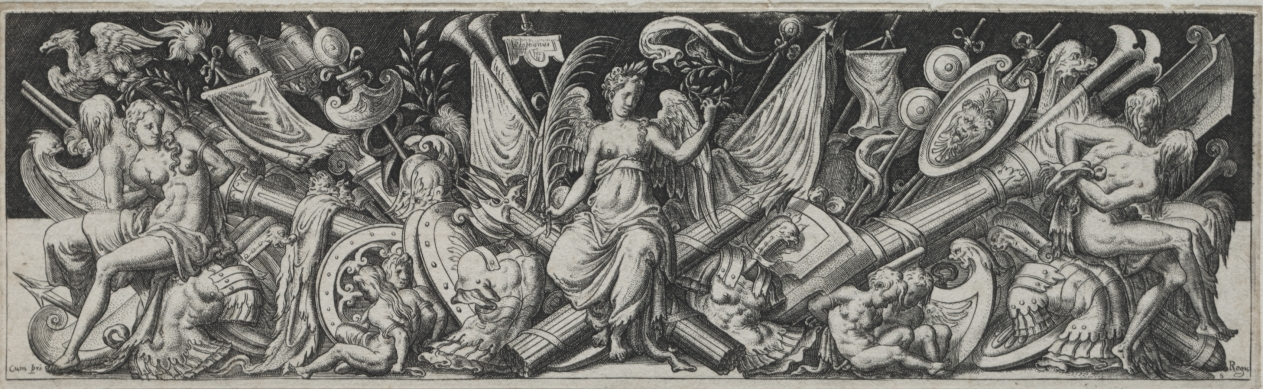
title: Combats and Triumphs No. 3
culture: France, 16th century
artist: Etienne Delaune (French, 1518/19-c. 1583)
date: c. 1550–72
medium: engraving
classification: Print